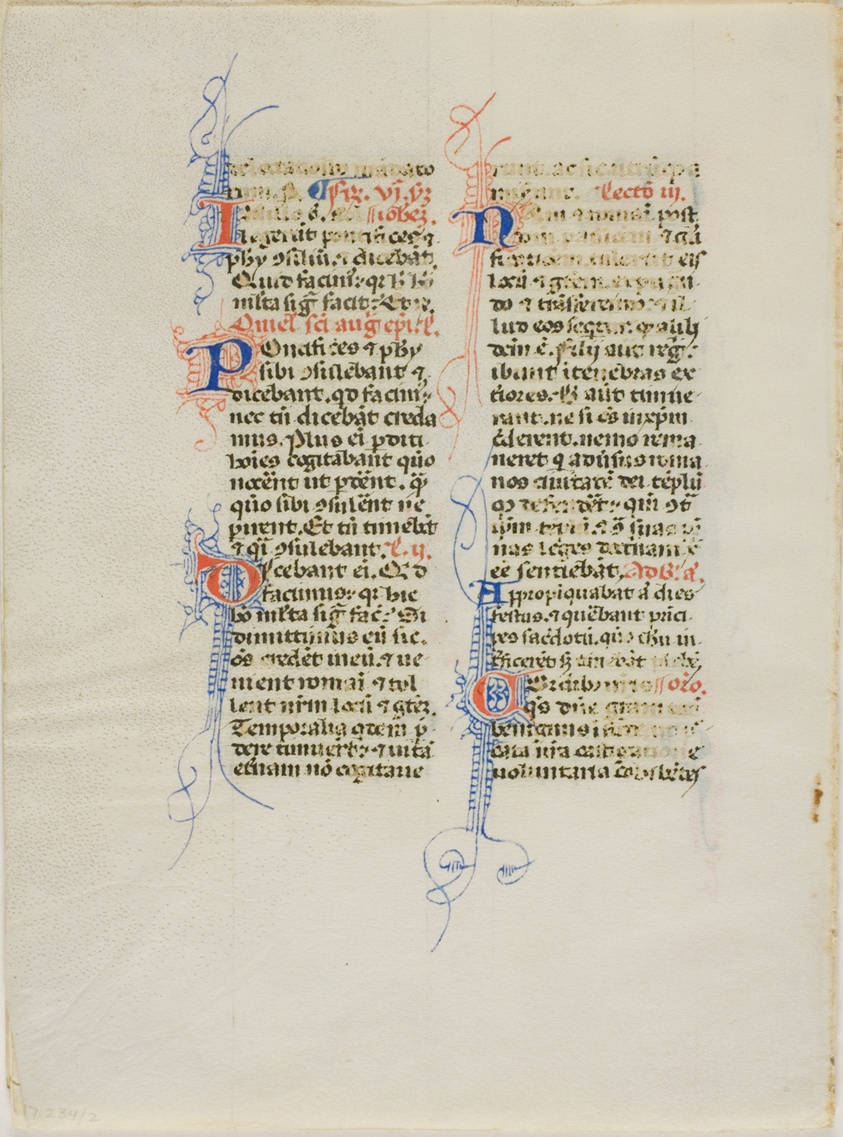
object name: Drawing and Watercolor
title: Illuminated Manuscript Leaf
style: medieval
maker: Italian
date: c. 1450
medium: Manuscript cutting with round gothic inscriptions in black, red and blue inks, and decorations in red and blue inks, on vellum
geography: Italy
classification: pen and ink drawings; manuscript; drawings (visual works); prints and drawing